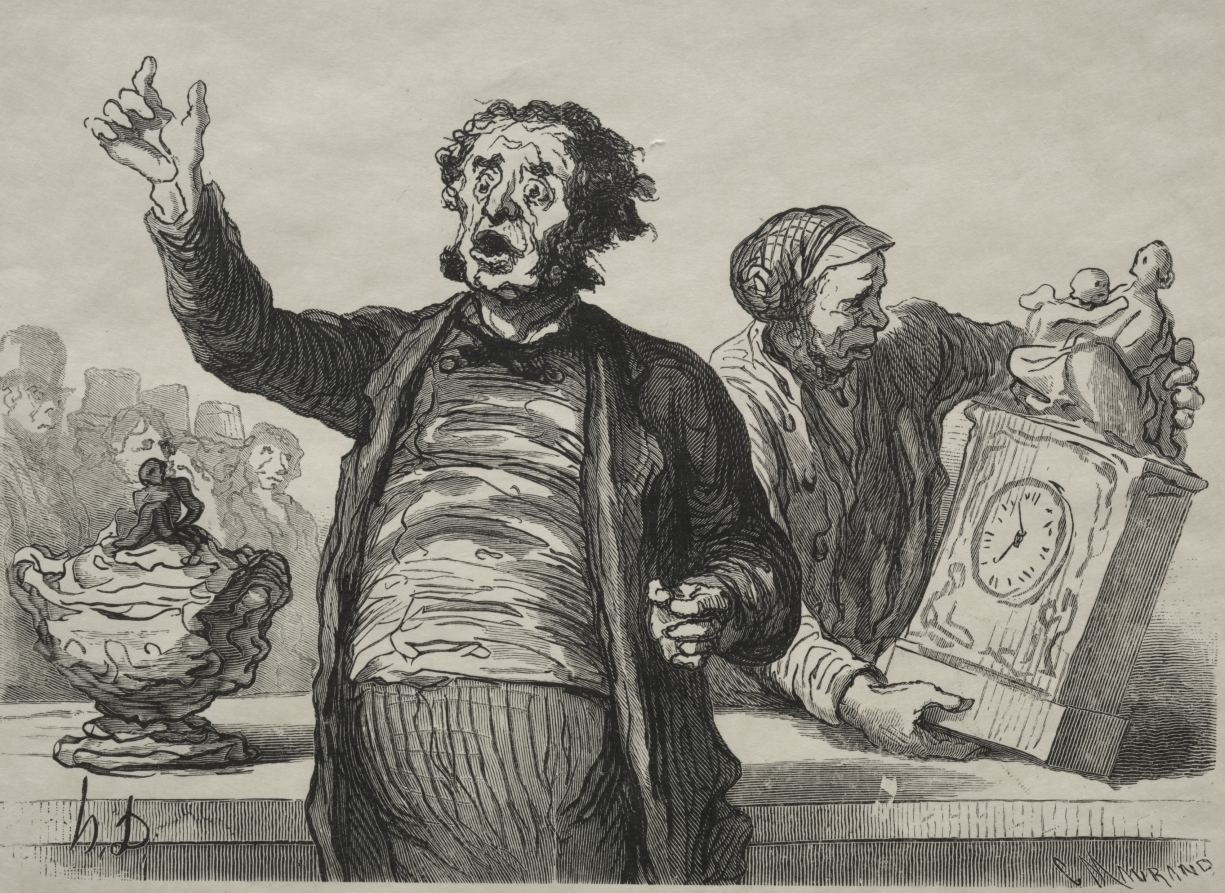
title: The Auction House: The Town Crier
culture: France, 19th century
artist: Honoré Daumier (French, 1808–1879)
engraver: Charles Maurand (French, 1824–1904)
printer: François Louis Schmied (Swiss, 1873–1941)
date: 1864, printed 1920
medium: wood engraving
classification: Print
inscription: Lower margin, pencil: 42/75 ; red stamp: FLS